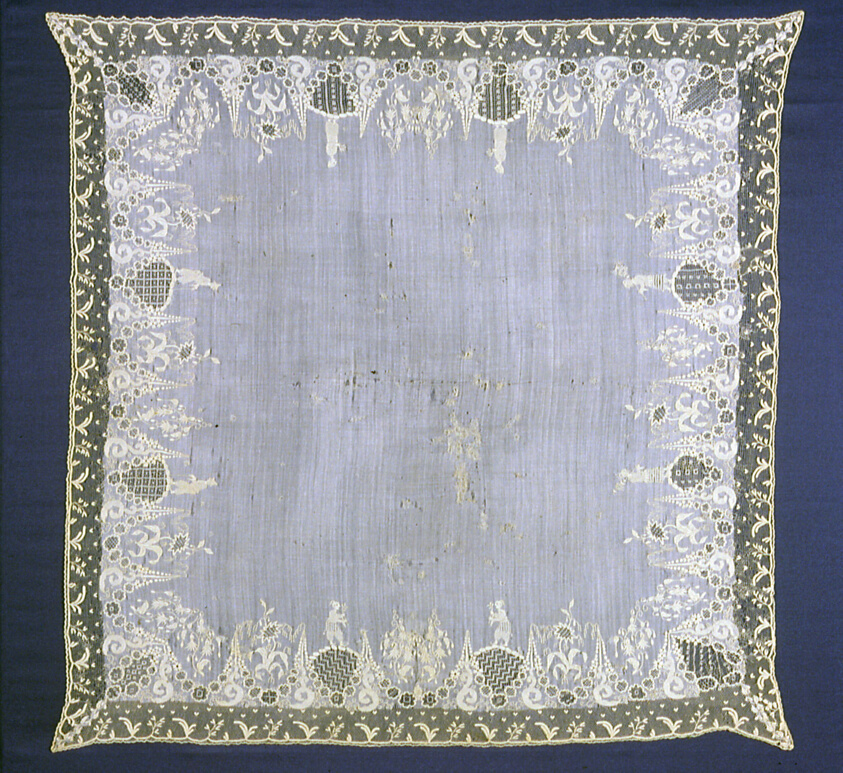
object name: Textile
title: Handkerchief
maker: England or France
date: 18th century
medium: Linen, plain weave; embroidered in cotton and linen yarns; pulled threadwork in interlocking lace, overcast, herringbone, and single faggot stitches; cut and drawn work in buttonhole, Italian hem, open chain and twisted button hole stitches; with areas of padding and inserts of twist net; embroidered in back, buttonhole, detached overcast, double running, eyelet hole, flame, open chain, padded satin, Roumanian, running, satin, sheaf filling, and stem filling stitches; laid work; couching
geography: England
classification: textile; needlework (visual works); costume; accessories (object genre)